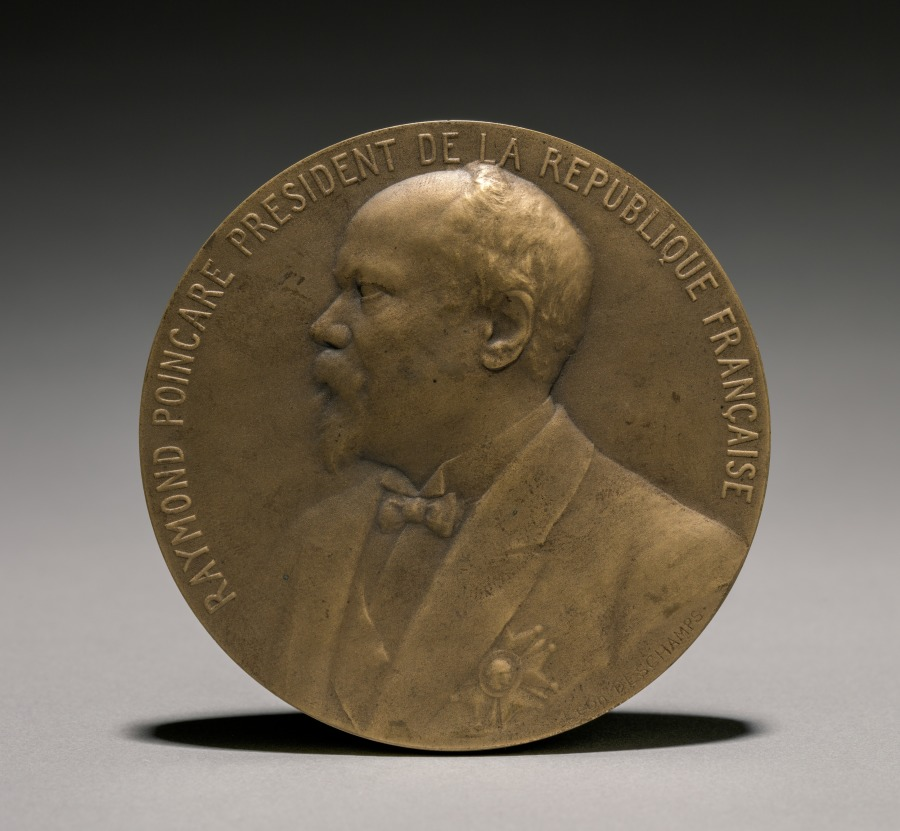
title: Poincarè Medal (obverse)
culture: France, 20th century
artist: Léon Julien Deschamps (French, 1860–1928)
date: 1900s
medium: bronze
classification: Metalwork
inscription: "Raymond Poincarè President de la Republique Francaise."